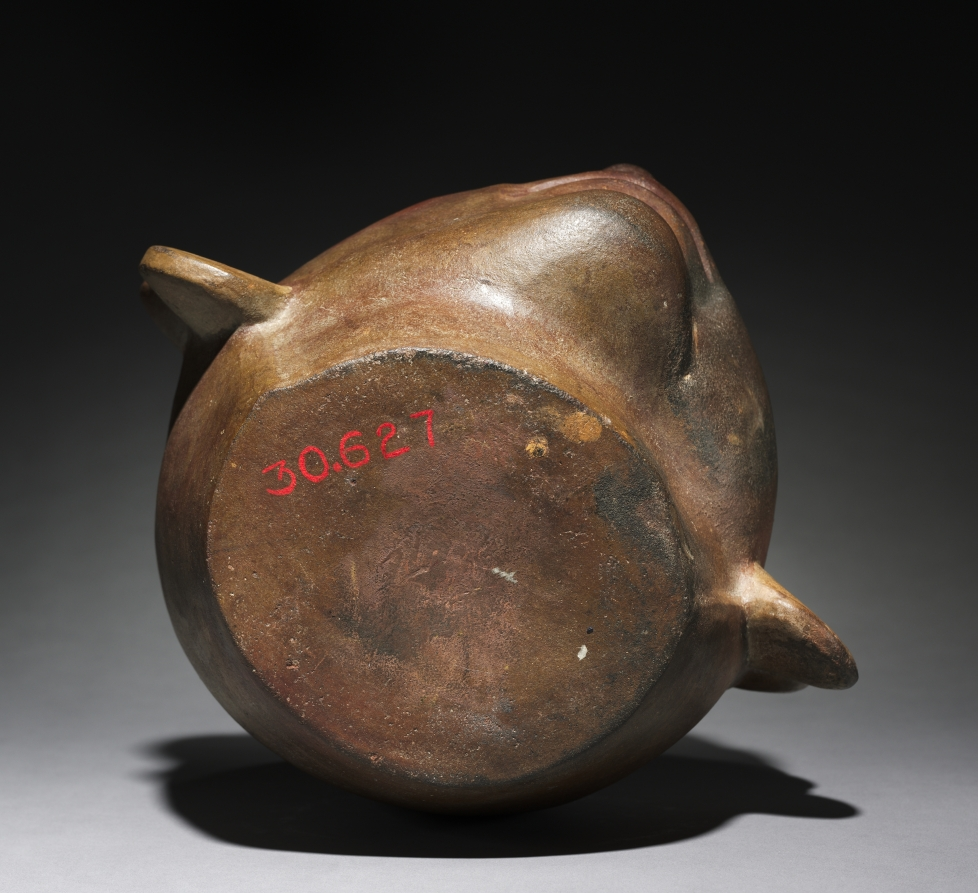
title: Portrait Head Vessel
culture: Peru, North Coast, Moche style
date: 200–550 CE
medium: earthenware with colored slips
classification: Ceramic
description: The Moche were unique in ancient Peru in creating realistic human portraits, usually in the form of ceramic vessels. This large example may represent an important captive who, like some Moche prisoner figures, wears double earrings and a hank of hair over the forehead.